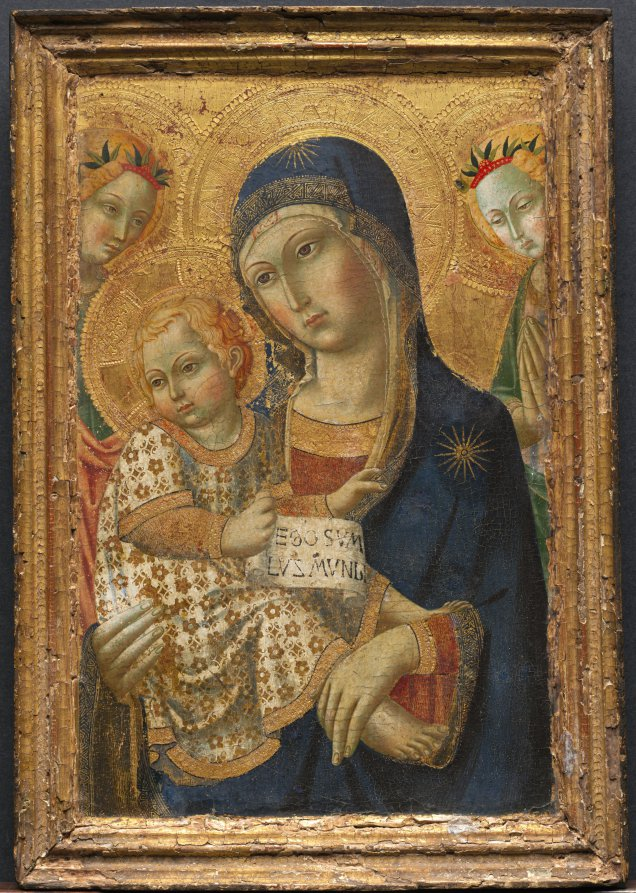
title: Virgin and Child Enthroned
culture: Italy, 19th century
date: 1800s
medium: oil on wood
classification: Painting